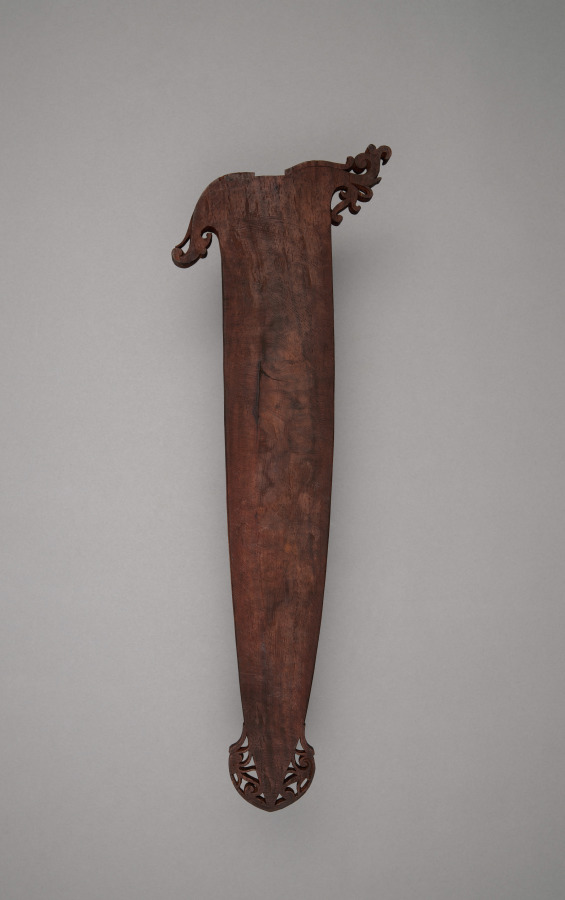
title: Scabbard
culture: Philippines, Mindanao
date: 1800s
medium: Wood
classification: Arms and Armor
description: This wooden scabbard was produced to house a barong blade, probably for a Maranao or Tausug community. It was carved from a single piece of hardwood, tapering toward the tip and widening slightly at the mouth. The upper section features scrolling okir motifs, while the rounded tip is decorated with finely pierced okir carving, forming a lacelike pattern characteristic of the Islamic groups of the southern Philippines.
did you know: The two halves of this scabbard are glued—instead of lashed—together.